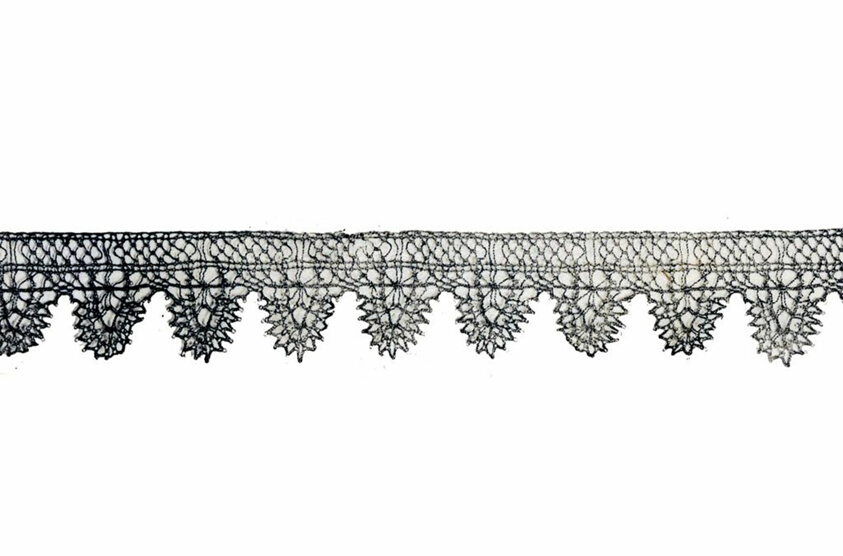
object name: Textile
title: Border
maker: Italy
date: 1601/25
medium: Gold-gilt-silver-strip-wrapped silk, bobbin straight lace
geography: Italy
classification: textile; lace - bobbin